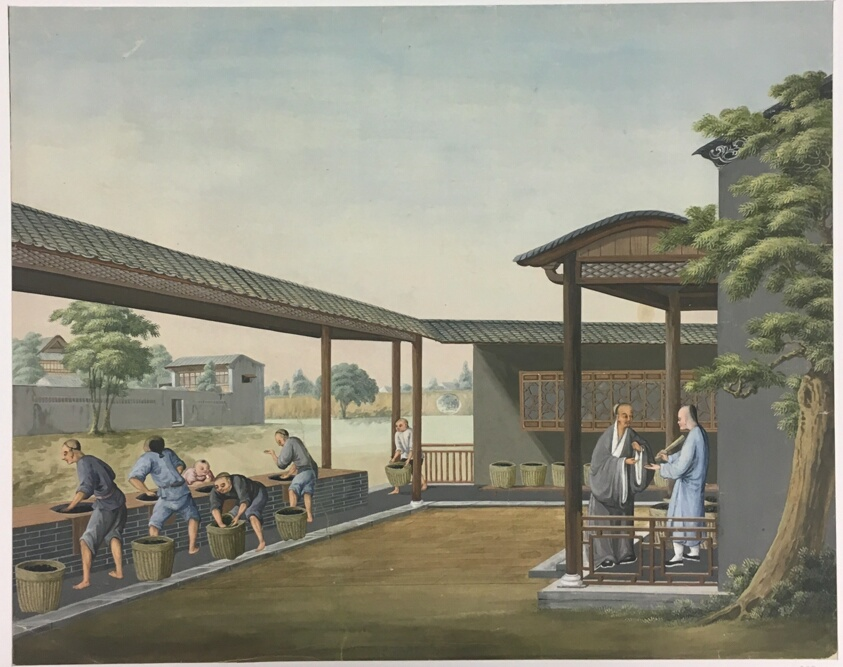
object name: Painting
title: Spinning Cloth, Preparing Tea Leaves, Preparing Silk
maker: China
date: Early 19th century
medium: Colors on paper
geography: China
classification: painting; asian art; print